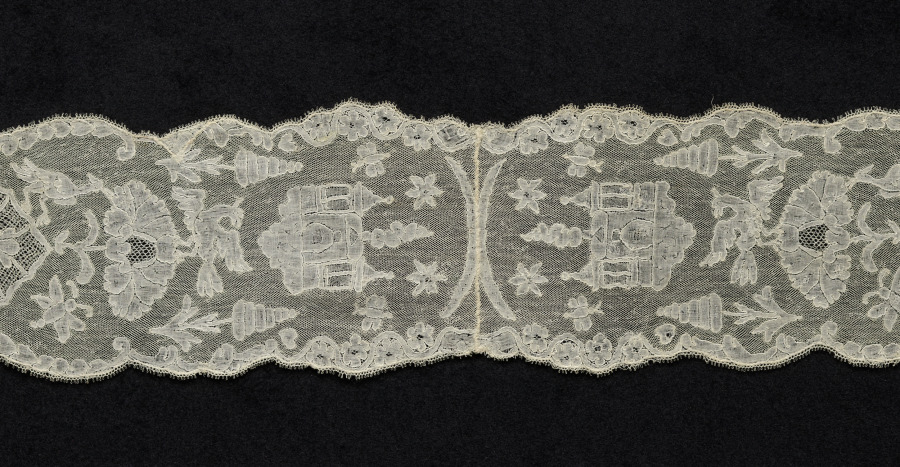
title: Lace Lappet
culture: Belgium, Mechelen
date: 1700s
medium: Linen: bobbin lace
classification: Lace